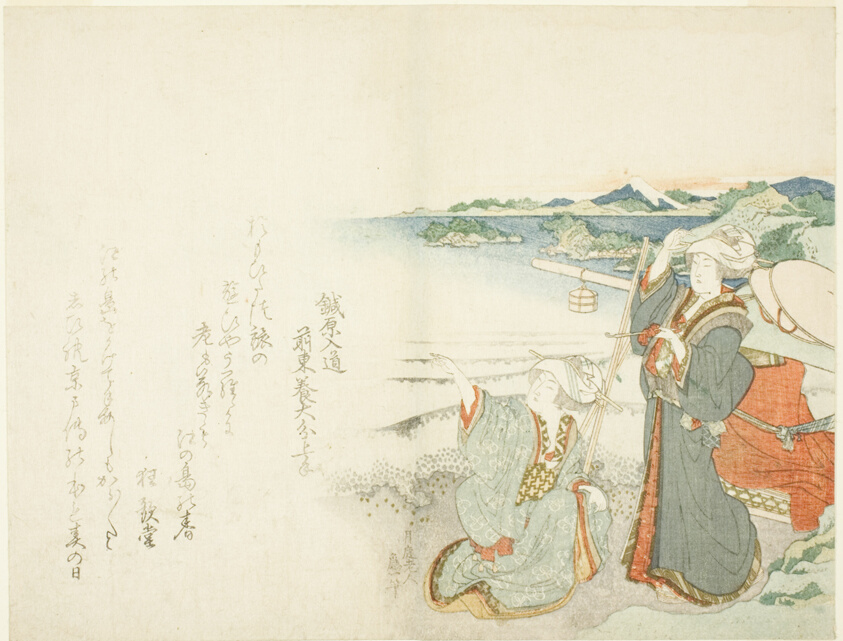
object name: Print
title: Pilgrimage to Enoshima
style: Japanese (culture or style)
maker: Katsushika Hokusai 葛飾 北斎; Japanese, 1760-1849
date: c. 1821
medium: Color woodblock print; chuban, surimono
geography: Japan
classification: woodblock print; print; asian art